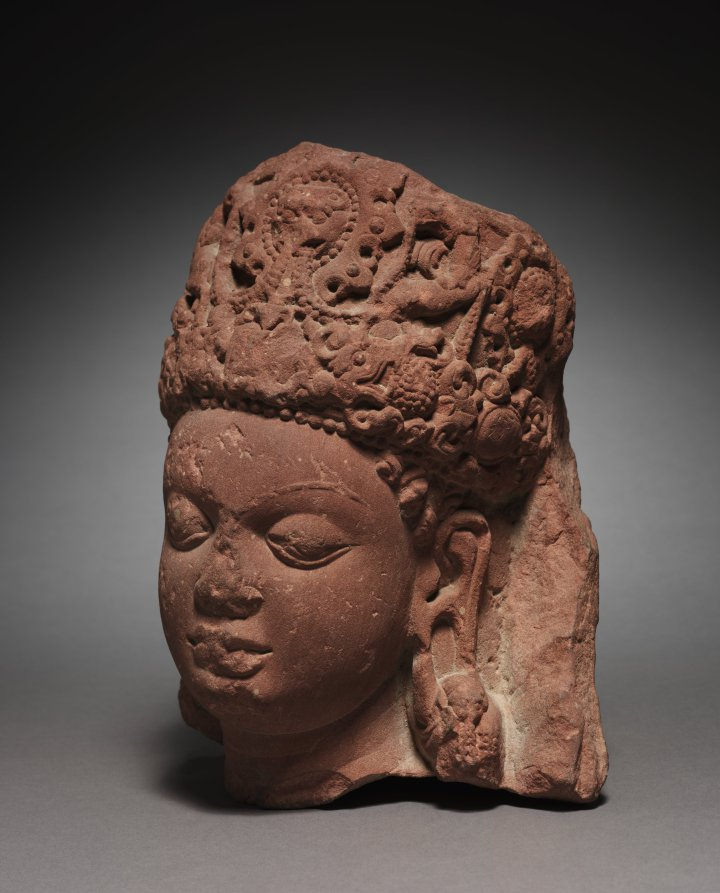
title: Head of Vishnu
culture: Northern India, Uttar Pradesh, Mathura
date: 400s CE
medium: sandstone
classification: Sculpture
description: During this period in India, the Hindu god Vishnu wears a distinctive squarish crown with a central medallion featuring a lion head. With strings of pearls issuing from his mouth, the imagery conveys the idea of radiance and glory. Devotees recognized Vishnu as having solar and royal attributes. His coiled ringlets of hair and heavy earrings also indicate that he was meant to have the appearance of a royal warrior.